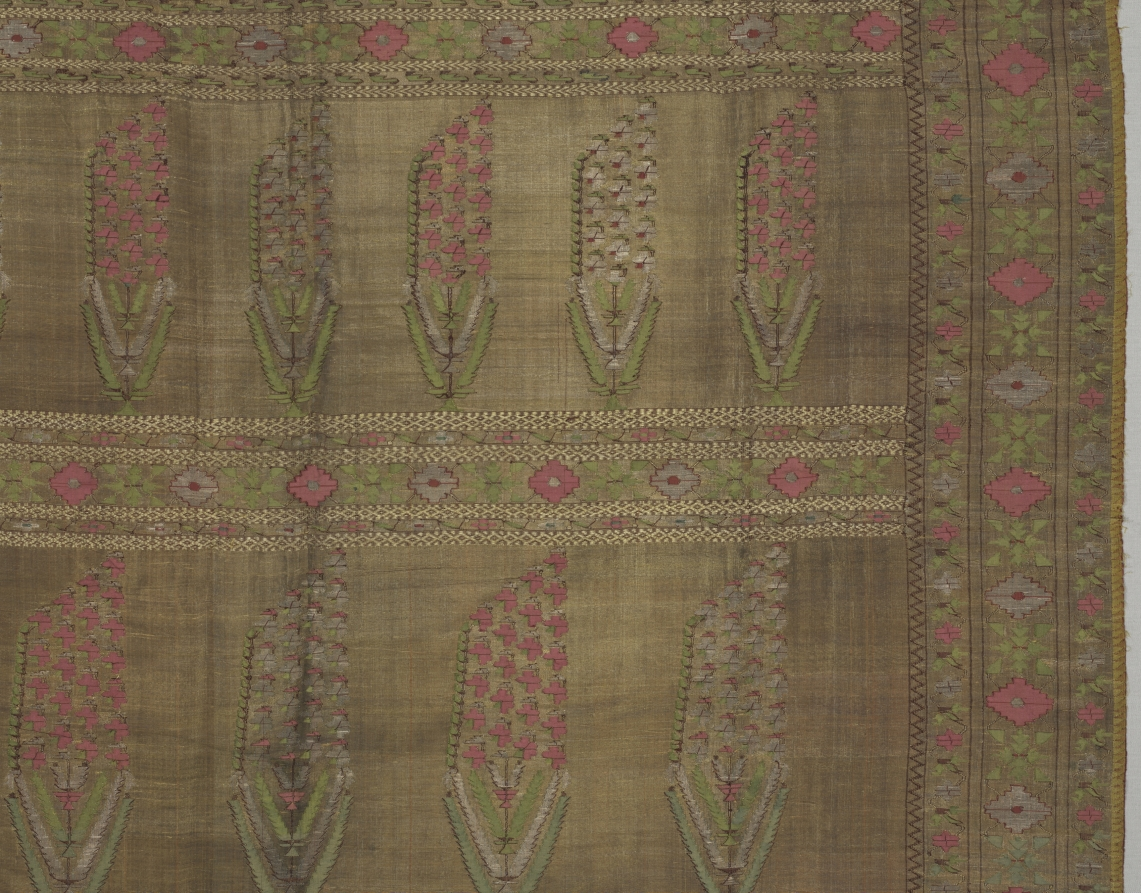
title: Fragment of a Sari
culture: India, Aurangabad ?, 18th-19th century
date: 1700s - 1800s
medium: brocade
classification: Textile